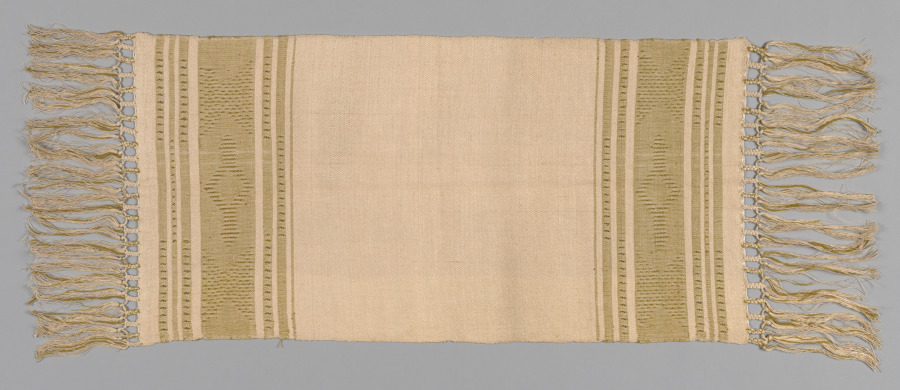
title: Towel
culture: America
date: 20th century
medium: linen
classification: Textile